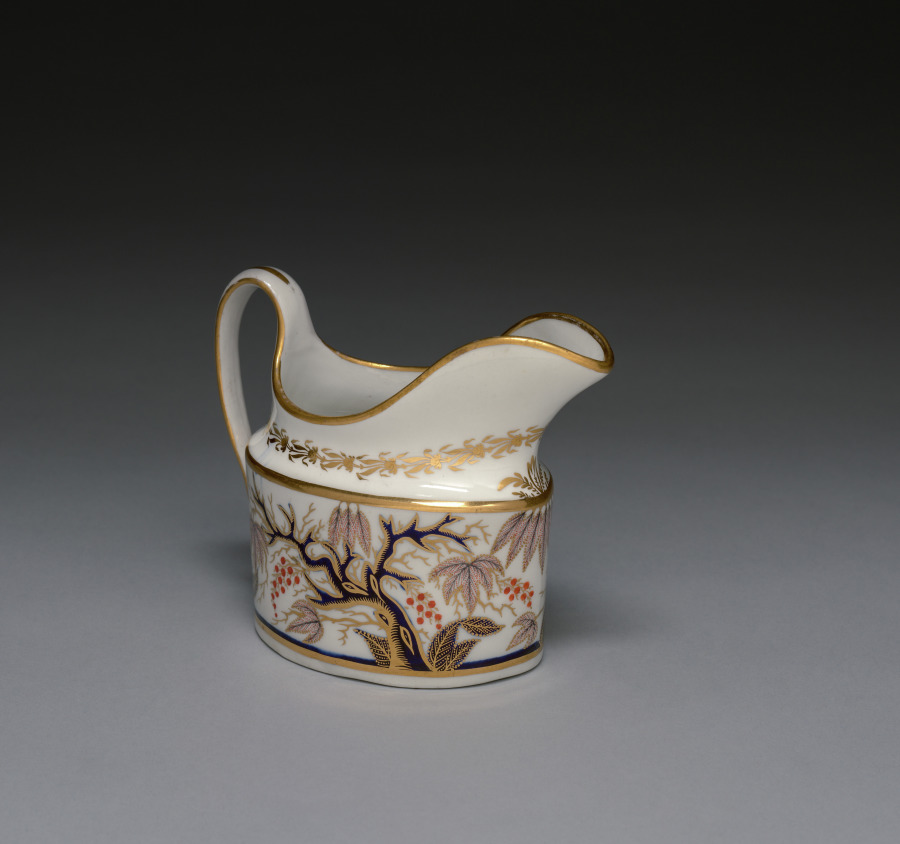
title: Cream Pitcher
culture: England, Staffordshire, late 18th Century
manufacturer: Spode Factory (British)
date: late 1700s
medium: ceramic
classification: Ceramic